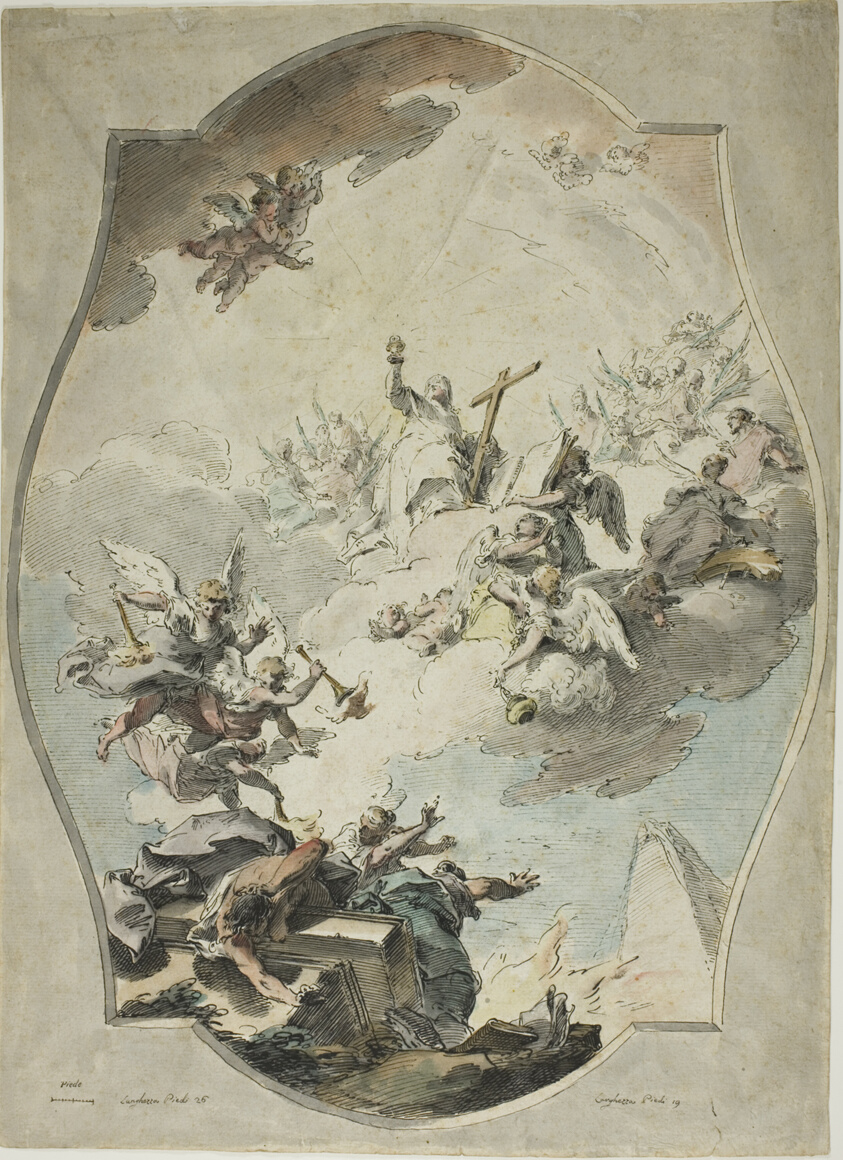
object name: Drawing and Watercolor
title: Faith Overcoming Heresy (recto); Tracing after Faith Overcoming Heresy (verso)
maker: Pietro Antonio Novelli (Italian, 1729-1804)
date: 1779/91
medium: Pen and black ink, watercolor, and brush and gray wash, with traces of black chalk (recto), and graphite (verso), on ivory laid paper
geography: Italy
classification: drawings (visual works); prints and drawing